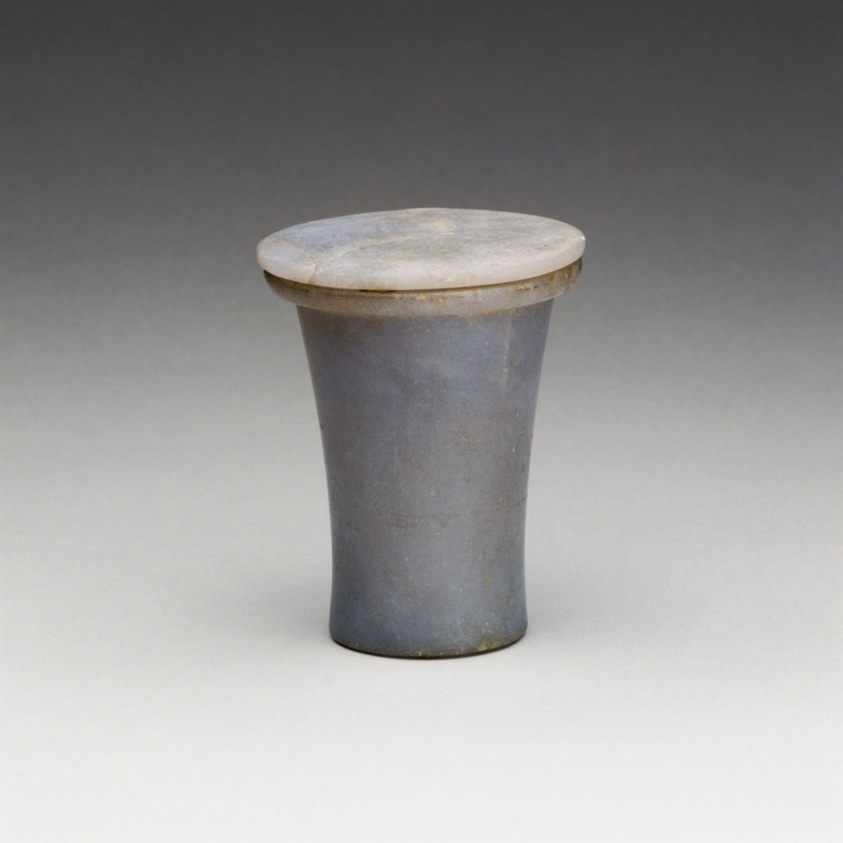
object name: Vessel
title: Ointment Jar with Lid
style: twelfth dynasty, middle kingdom, ancient, egyptian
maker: Egyptian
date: Middle Kingdom, Dynasty 12 (about 1985-1773 BCE)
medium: Anhydrite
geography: Egypt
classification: personal grooming / hygiene / cosmetic container; stone; vessel; ancient art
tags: rituals, beauty